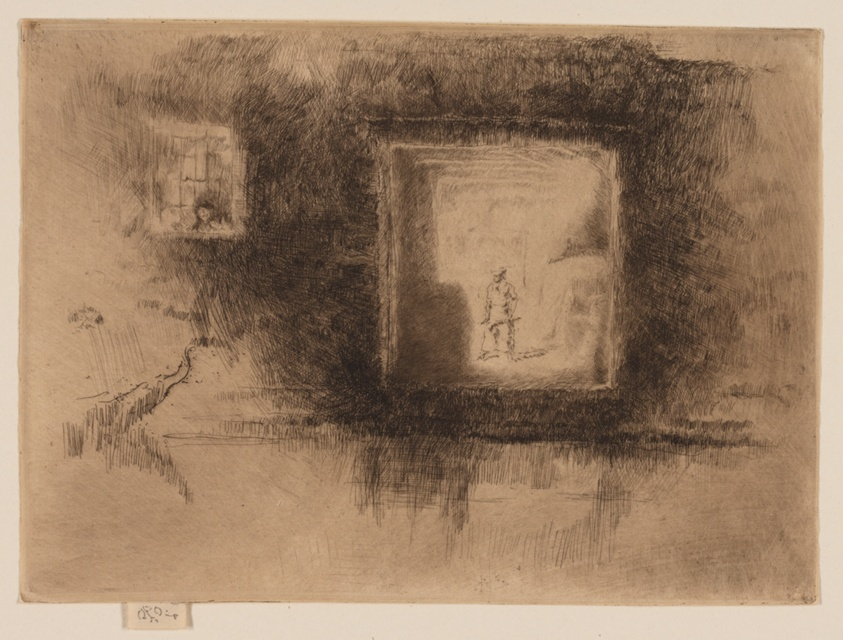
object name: Print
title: Nocturne: Furnace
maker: James McNeill Whistler (American, 1834-1903)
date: 1879/80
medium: Etching and drypoint with foul biting in dark brown ink on Asian laid paper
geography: United States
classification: etching; foul biting; print; prints and drawing; drypoint; paper